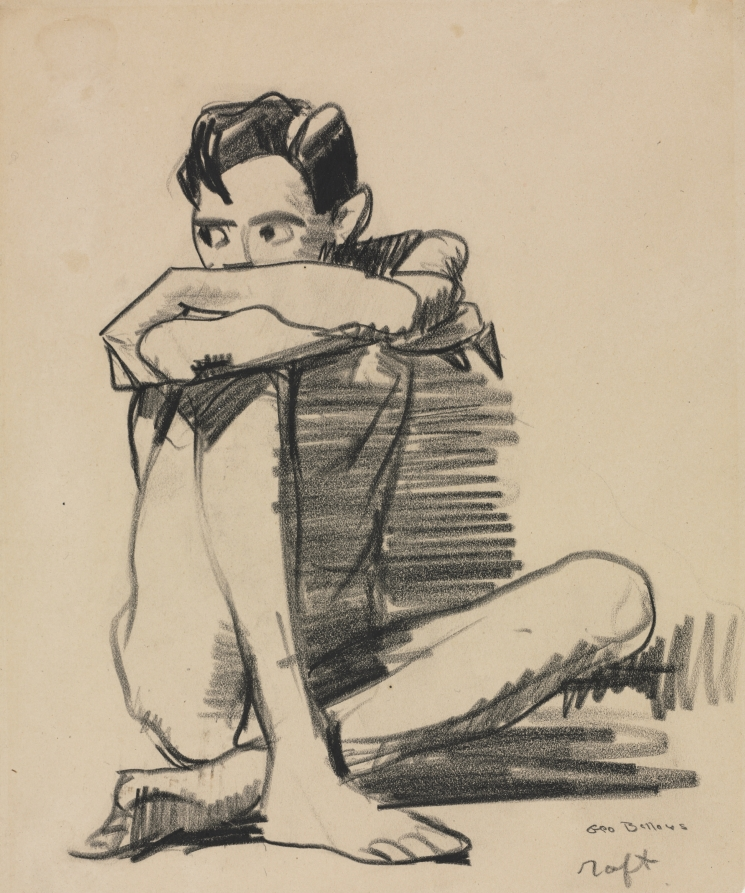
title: Seated Boy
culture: America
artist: George Bellows (American, 1882–1925)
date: c. 1914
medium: black crayon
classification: Drawing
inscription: Signed in pencil, lower right: "Geo Bellows (signed)/raft"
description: The seated youth in this drawing was probably made as a study for one of the many young boys in George Bellows’s lithographs Splinter Beach and River-Front or their related paintings. The inscription “raft” below the figure suggests that the pose was intended for the large raft in the River-Front composition, although a pose with greater similarity appears on the shoreline in the same print. Bellows’s quick sketch captures the wiry, perhaps undernourished physique and the darting eyes of the young man.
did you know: Bellows made several compositions of boys swimming and lounging on the banks of the East River in New York City, based on studies such as this one.